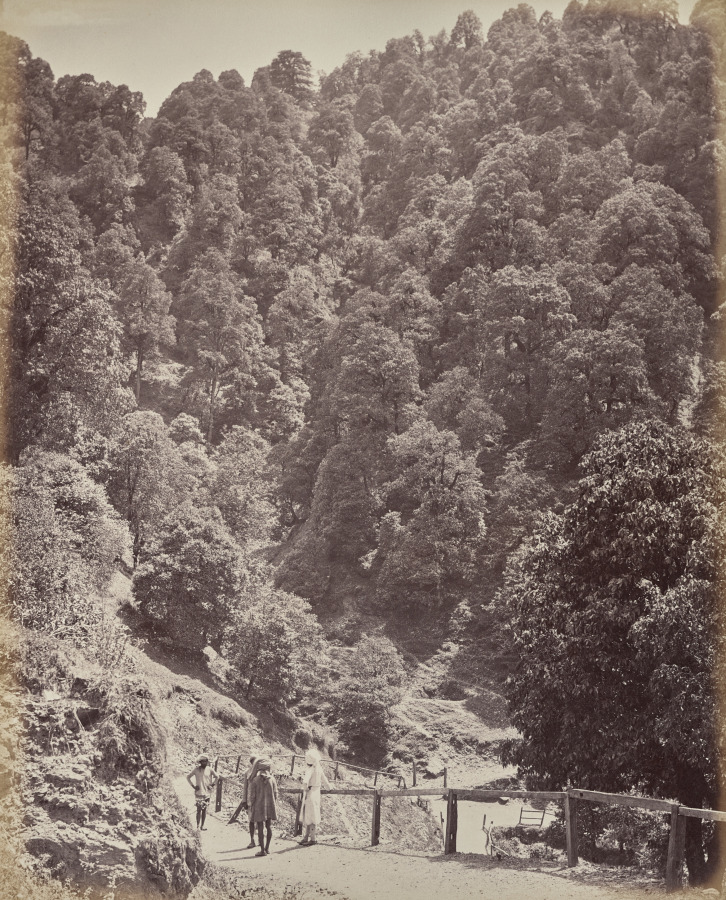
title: Shimla. View North of Mount Jakko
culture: England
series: Photographs of Northern India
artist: Samuel Bourne (British, 1834–1912)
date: 1863–70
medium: albumen print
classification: Photograph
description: The 50 images in this album, all taken in the 1860s, move from the hill towns of the Himalayas down to cities including Lahore (now in Pakistan), Delhi, Lucknow, Agra, Benares (now Varansi), and Calcutta (now Kolkata). Architectural studies of major monuments offer valuable historical records of what sites such as the Taj Mahal and the imperial mosque of the Mughal emperors in Delhi looked like before 20th-century restorations.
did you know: Samuel Bourne, the author of most the images in this album, was a banker in England before he moved to India to become a professional photographer.